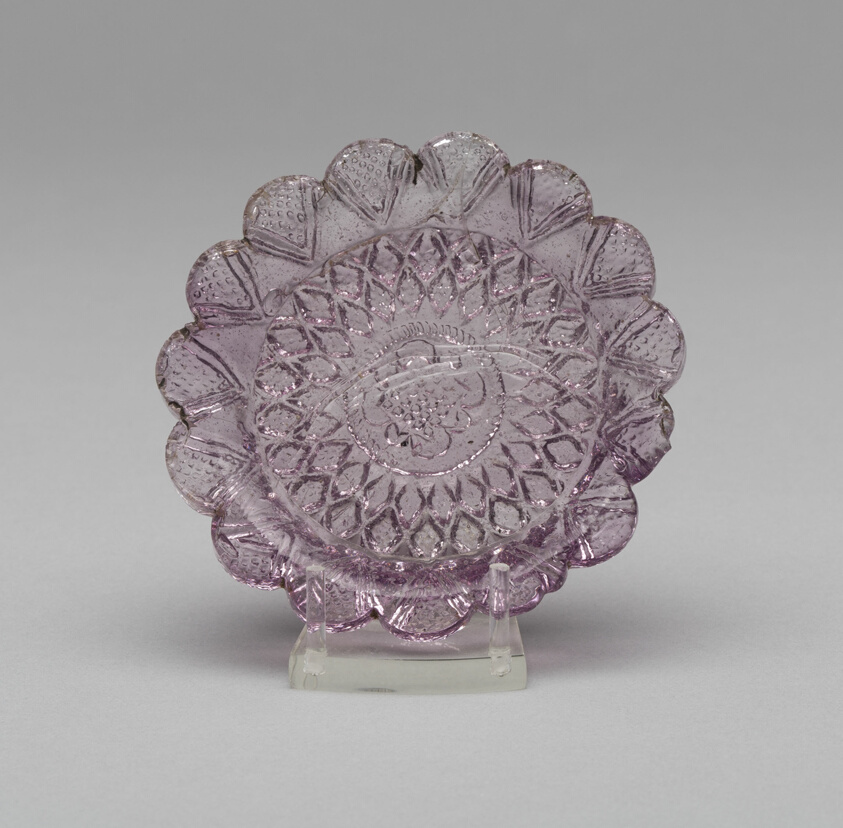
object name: Glass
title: Cup plate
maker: Artist unknown (American, 19th century); New England or Eastern Pennsylvania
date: 1826–30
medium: Pressed glass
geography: New England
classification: plate (general, dish); glass; american decorative arts; american arts; decorative arts